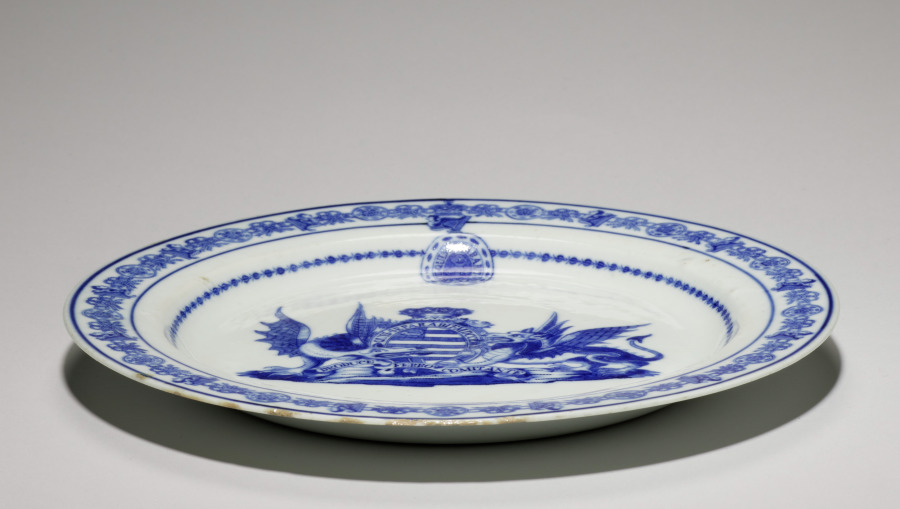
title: Plate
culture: China, Chinese Export, 18th century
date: 1783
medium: underglaze blue porcelain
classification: Ceramic